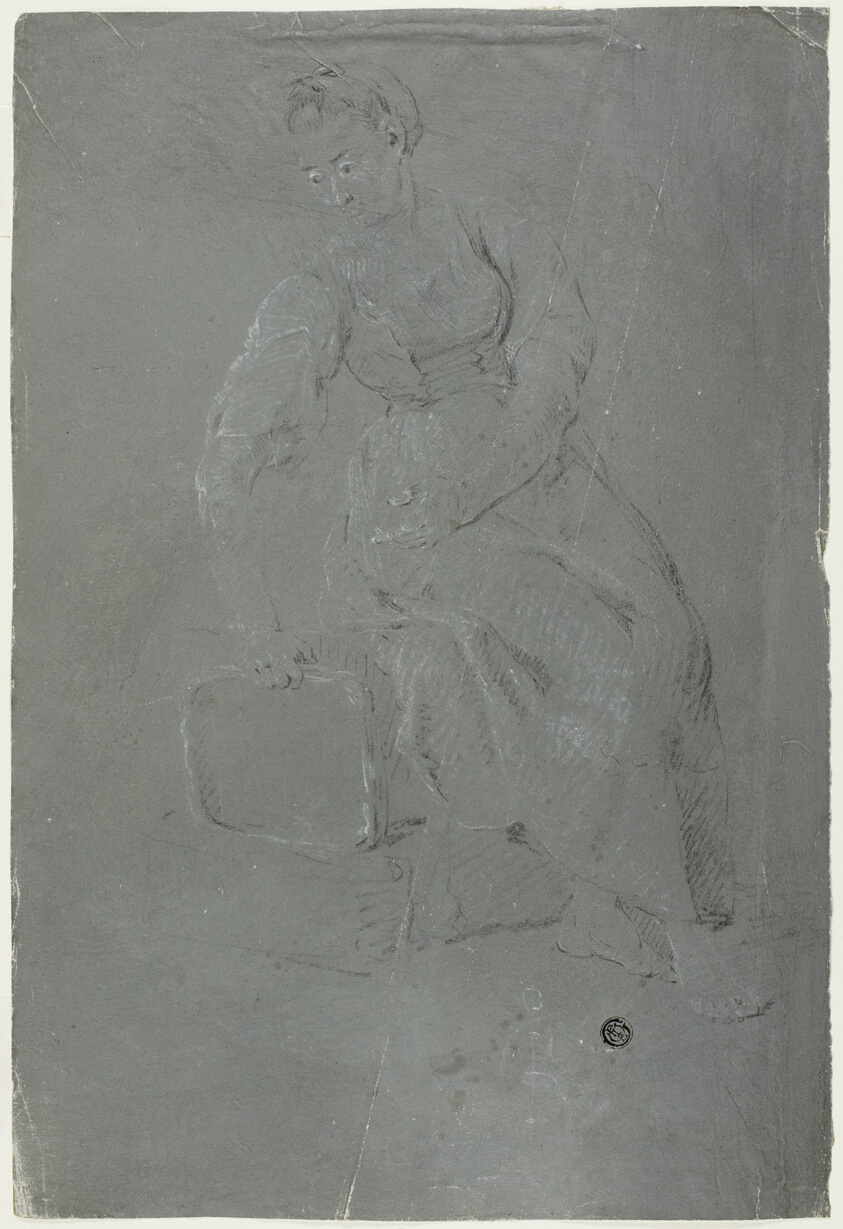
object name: Drawing and Watercolor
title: Seated Woman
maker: Pierre-Jacques Volaire (French, 1729-1799)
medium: Black and white chalk, on gray prepared ground, on ivory laid paper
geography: France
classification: chalk; drawings (visual works); prints and drawing